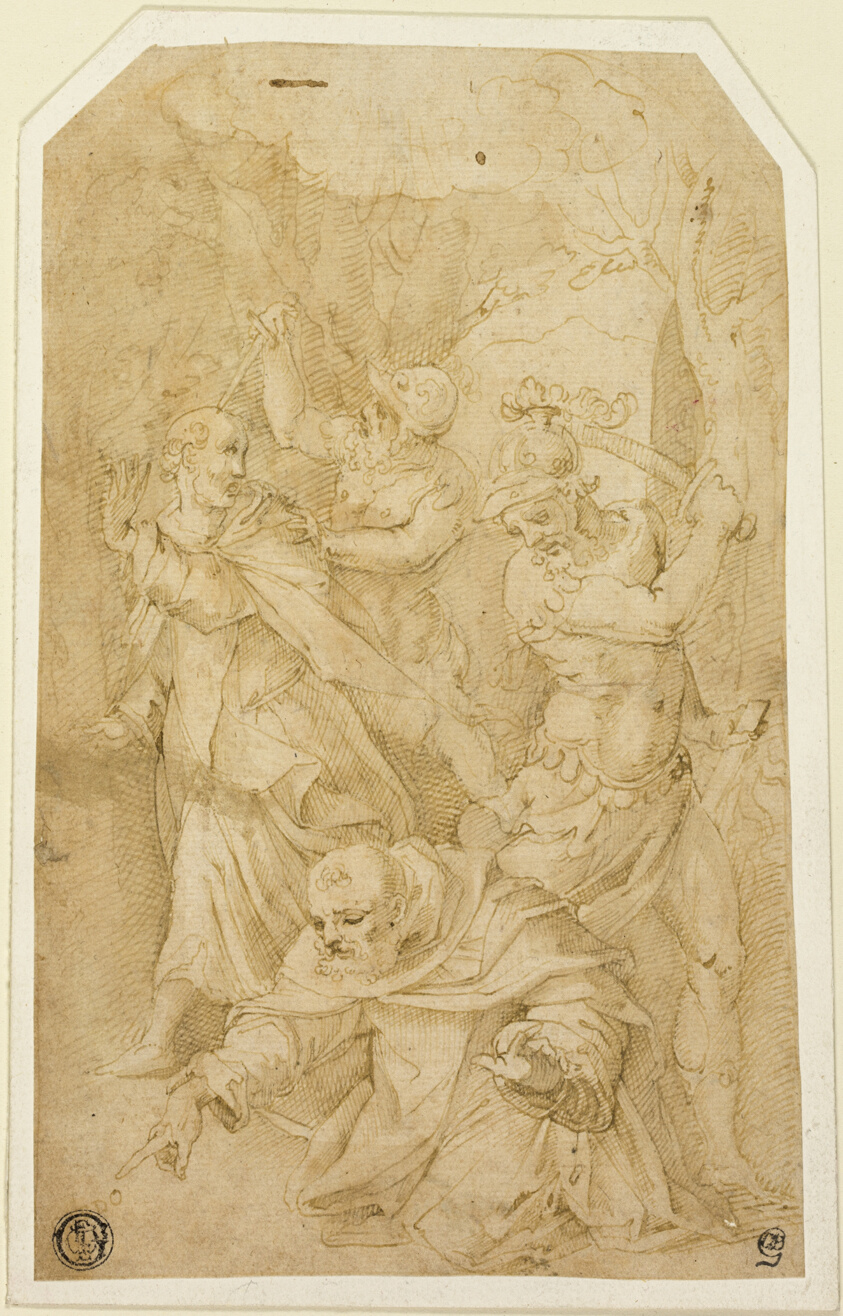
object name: Drawing and Watercolor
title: Study for the Death of Saint Peter Martyr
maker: Circle of Giorgio Vasari (Italian, 1511-1574)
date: c. 1571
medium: Pen and brown ink with brush and brown wash, over traces of black chalk, on cream laid paper, laid down on ivory laid paper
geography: Italy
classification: ink with wash; drawings (visual works); prints and drawing